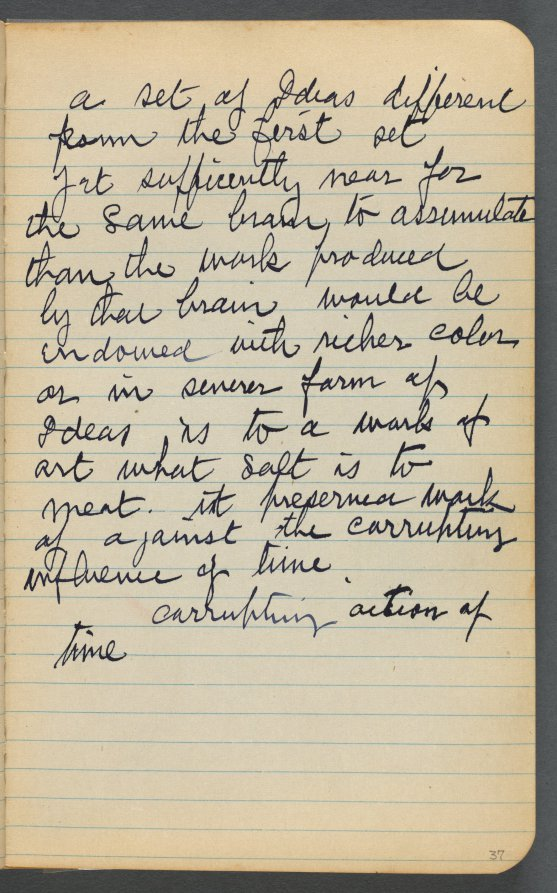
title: Sketchbook, page 037: Notes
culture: America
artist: Maurice Prendergast (American, born Newfoundland [now Canada], 1858–1924)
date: 1905–10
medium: graphite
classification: Bound Volume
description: This sketchbook contains 69 pages of drawings, a diary largely devoted to the state of the artist's health, and a three-page discourse on the nature of genius and ideas.